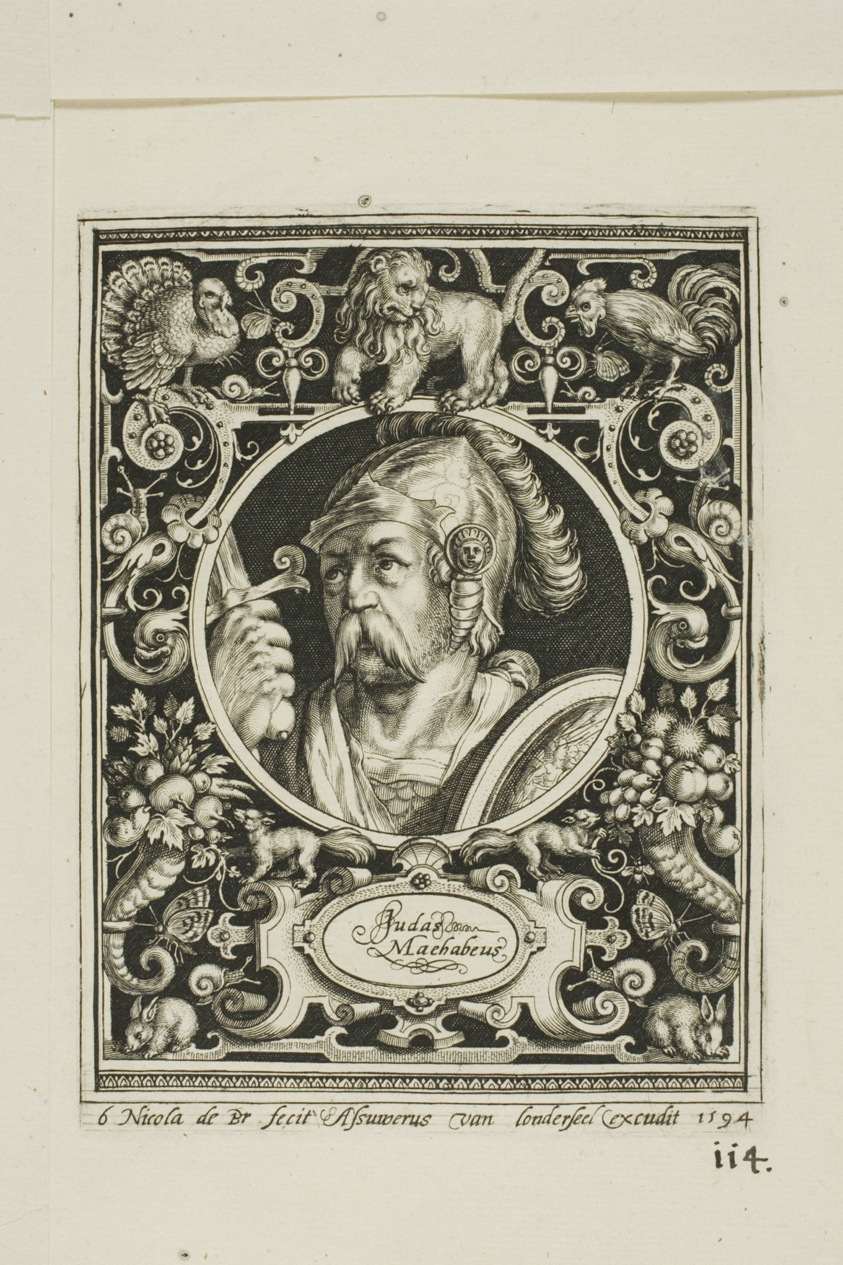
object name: Print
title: Judas Macabee, plate six from The Nine Worthies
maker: Nicolaes de Bruyn (Flemish, 1571-1656); published by Assuerus van Londerseel (Flemish, 1572-1635)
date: 1594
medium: Engraving in black on cream laid paper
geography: Flanders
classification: engraving; prints and drawing; print